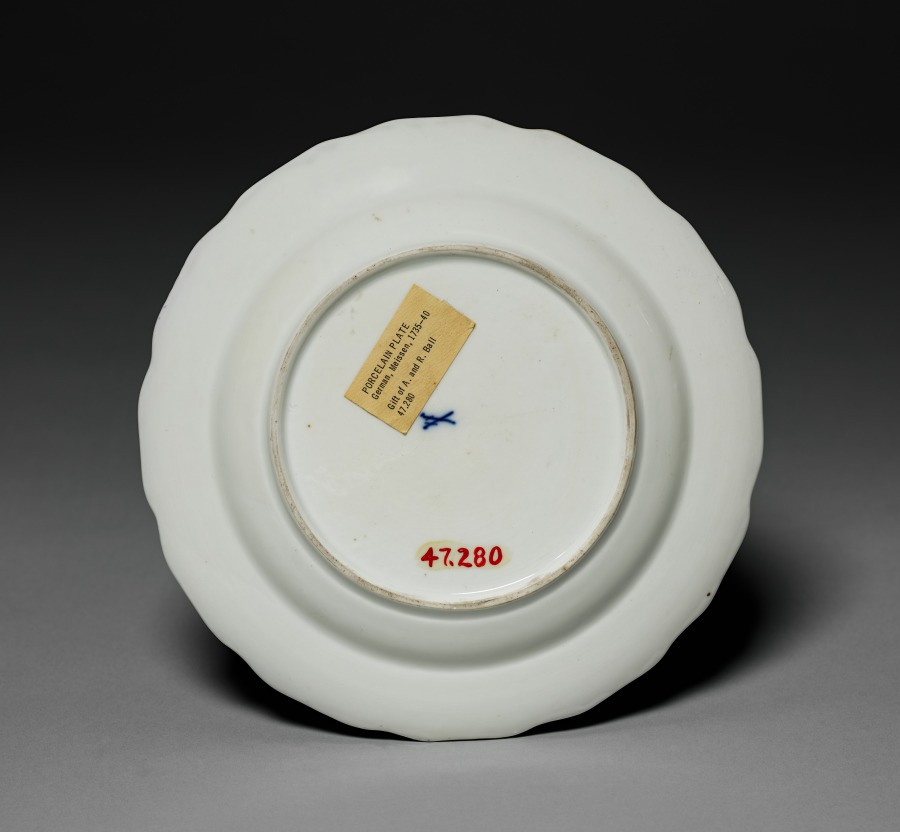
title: Plate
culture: Germany, Meissen, 18th century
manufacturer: Meissen Porcelain Factory (German, est. c. 1710)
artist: manner of Adam Friedrich von Lowenfinck (German, 1714–1754)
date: c. 1740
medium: porcelain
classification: Ceramic